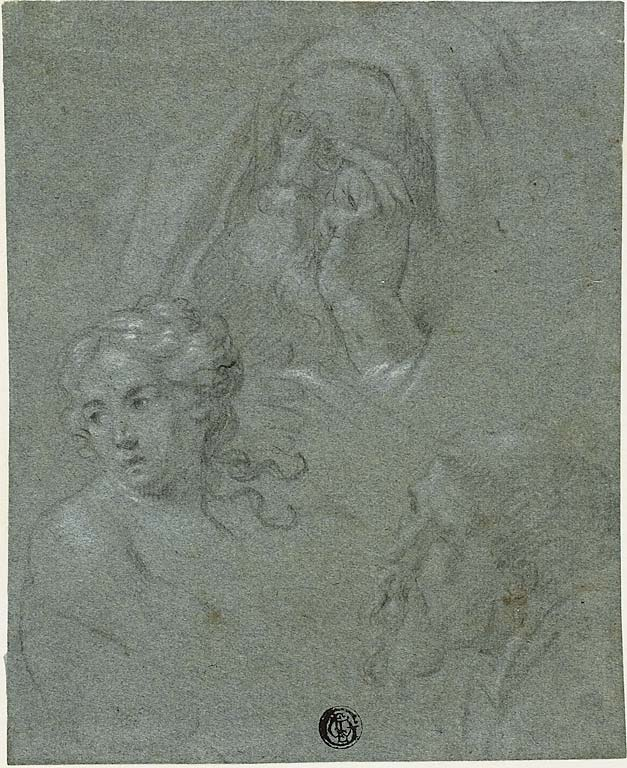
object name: Drawing and Watercolor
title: Sheet of Sketches with Three Heads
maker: Attributed to Ferdinand Elle; French, 1648-1717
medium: Black and white chalk on blue laid paper, laid down on Japanese paper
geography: France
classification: charcoal; drawings (visual works); prints and drawing